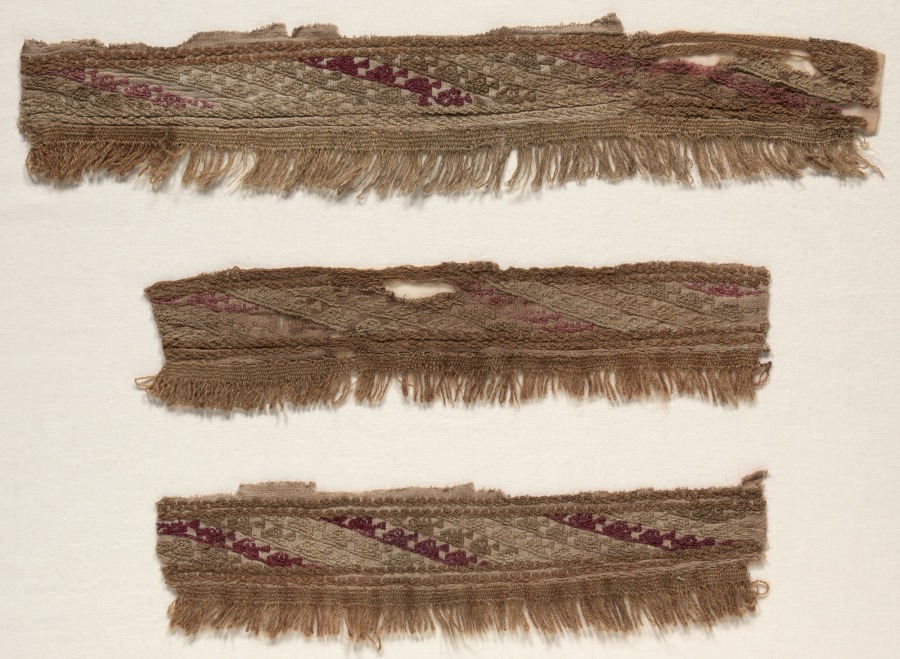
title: Three Border Fragments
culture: Peru, Central Coast, Chancay, 12th-15th century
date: c. 1100–1400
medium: tabby, brocaded; cotton and wool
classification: Textile